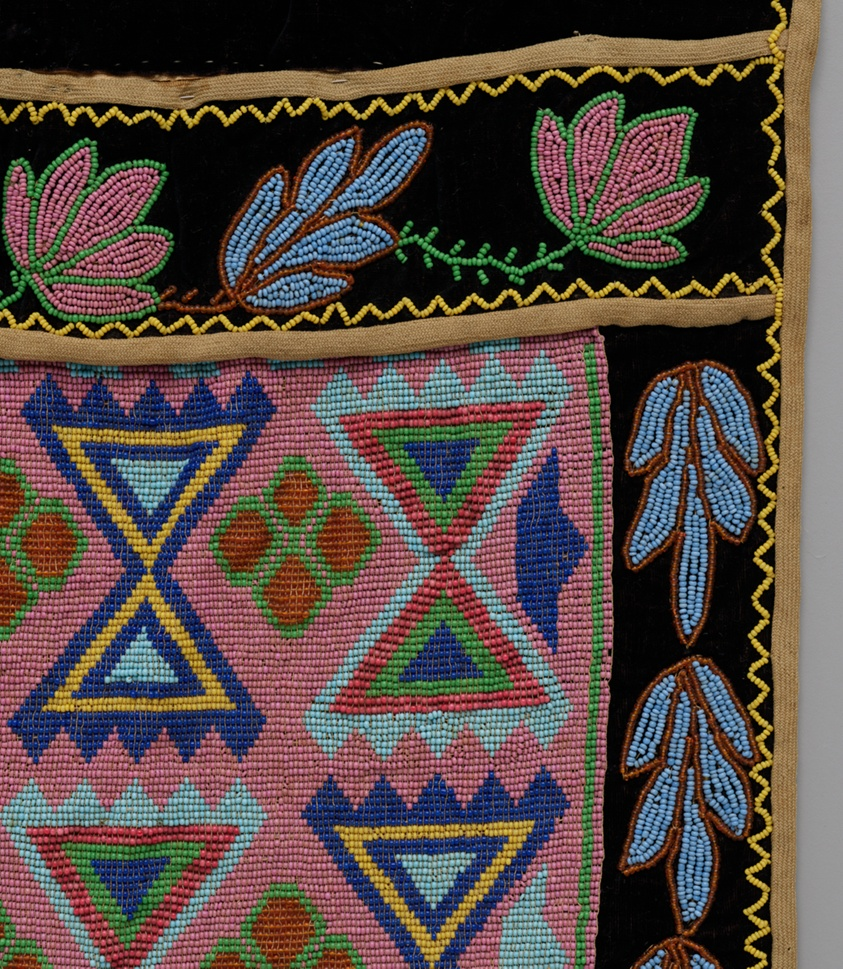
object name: Costume and Accessories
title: Man's Shoulder Bag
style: potawatomi, native american, americas, Arts of the Americas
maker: Maker unknown (Potawatomi); Great Lakes region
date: Mid–late 19th century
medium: Cotton, velvet, yarn, and glass seed beads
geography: Great Lakes Region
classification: beadwork; costume accessory; costume; art of the americas